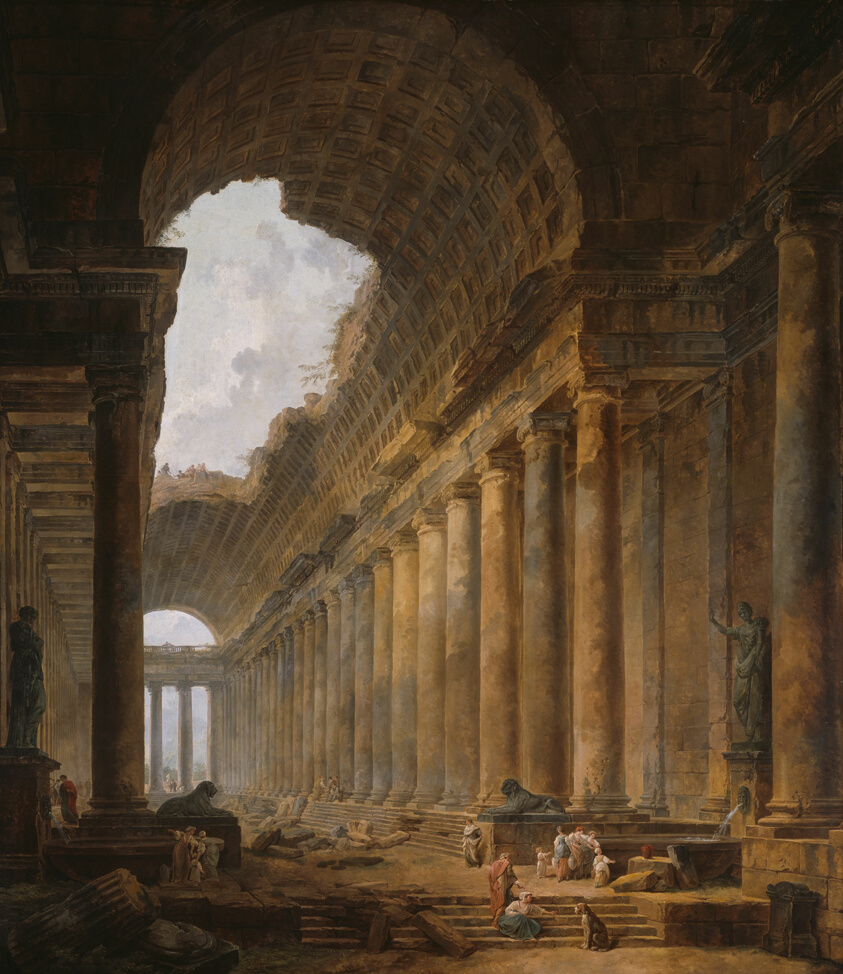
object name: Painting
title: The Old Temple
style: Neoclassicism, 18th Century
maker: Hubert Robert (French, 1733-1808)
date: 1787/88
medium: Oil on canvas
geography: France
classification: oil on canvas; architecture; french; oil paintings (visual works); paint; painting; european painting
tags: ruins, architechture, architecture, architecture, classical, decoration, decorative, Italy, temple, landscapes, Century of Progress, world's fairs, Chicago World's Fairs